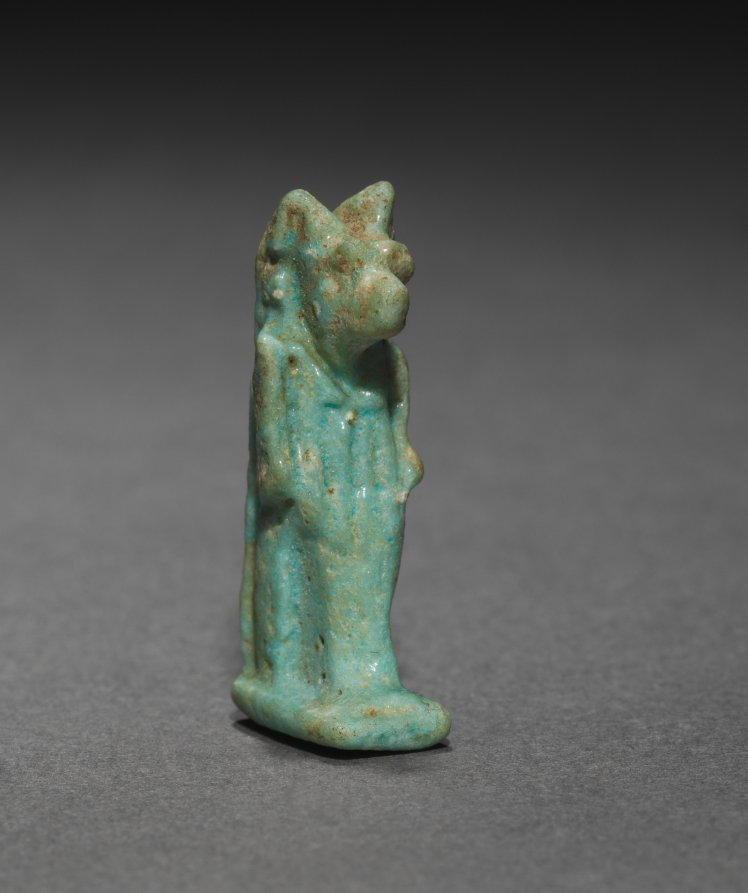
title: Amulet of Anubis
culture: Egypt, Greco-Roman period (332 BCE–395 CE), Ptolemaic dynasty (305–30 BCE)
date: 305–30 BCE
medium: light robin's egg blue faience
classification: Amulets